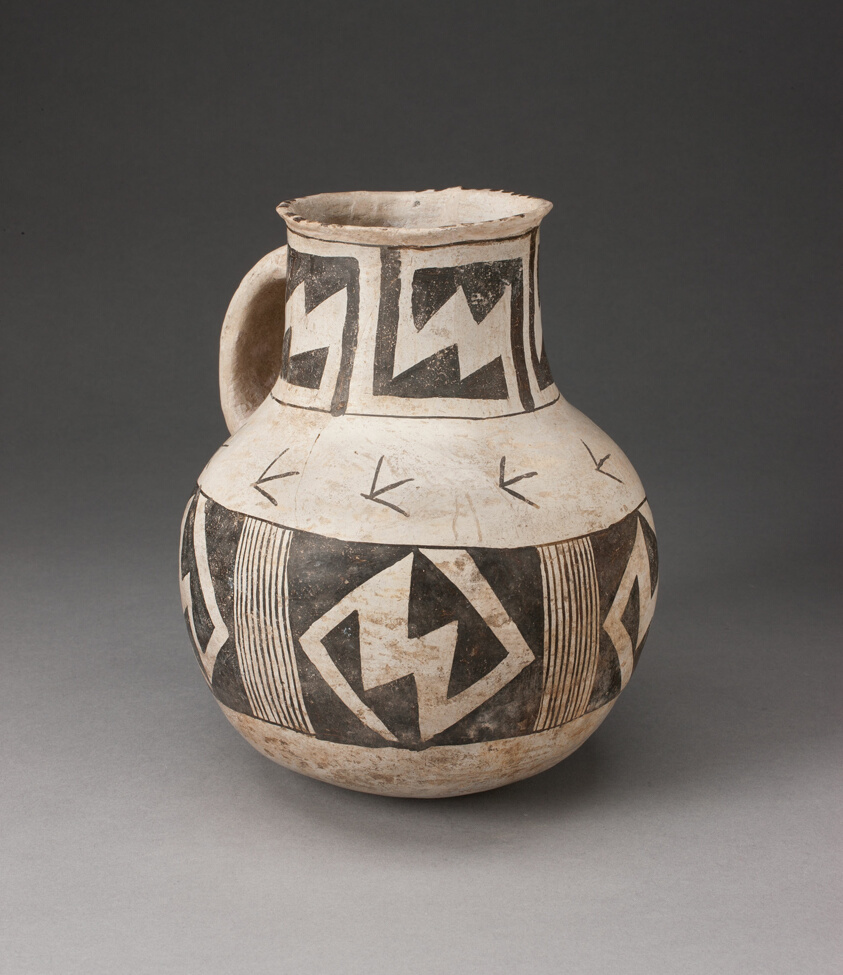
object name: Vessel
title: Pitcher with Stepped-Interlocking Motifs and Vertical Hatching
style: ancestral pueblo (anasazi), anasazi, Pre-Columbian, americas, southwest, pueblo, Arts of the Americas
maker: Ancestral Pueblo (Anasazi), Kayenta Black-on-white; Kayenta area, north-east Arizona, United States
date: 950–1400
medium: Ceramic and pigment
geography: Arizona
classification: earthenware; ceramics; vessel; art of the americas